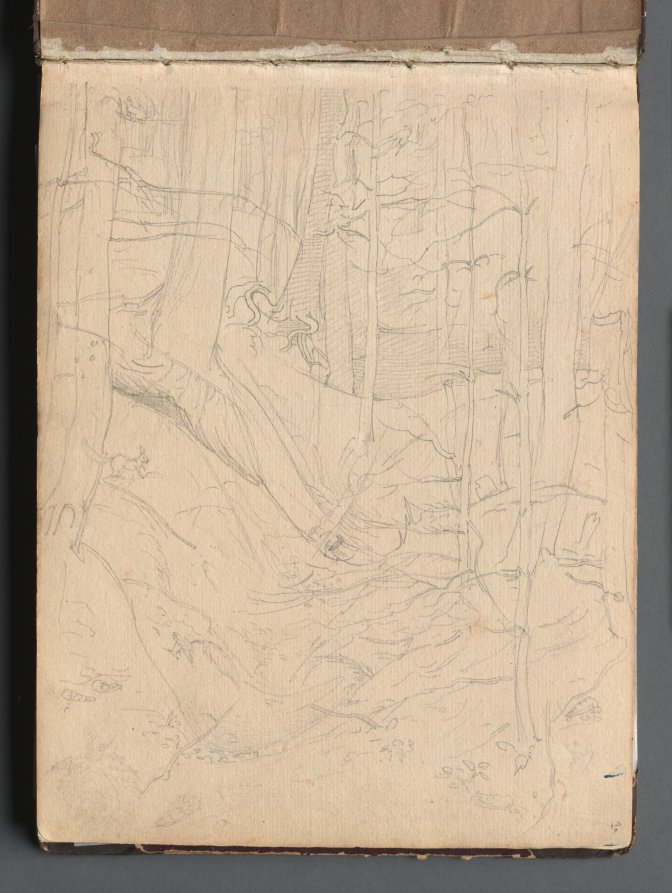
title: Album with Views of Rome and Surroundings, Landscape Studies, page 01a: Roman Landscape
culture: Germany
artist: Franz Johann Heinrich Nadorp (German, 1794–1876)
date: c. 1830s-70s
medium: graphite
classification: Bound Volume